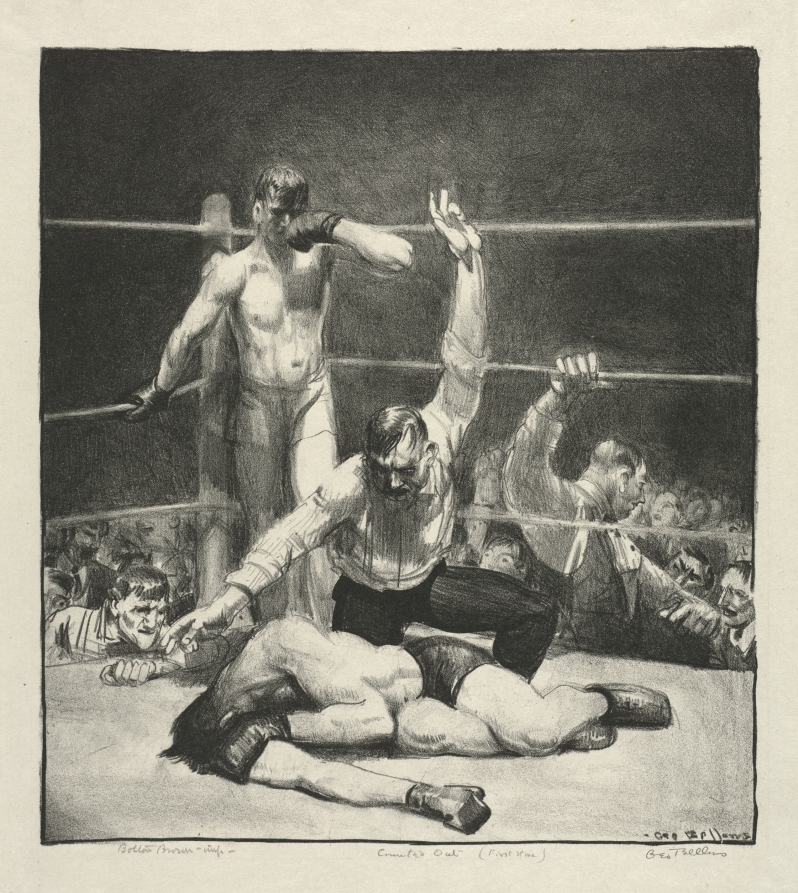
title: Counted Out, First Stone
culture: America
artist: George Bellows (American, 1882–1925)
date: 1921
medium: lithograph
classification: Print